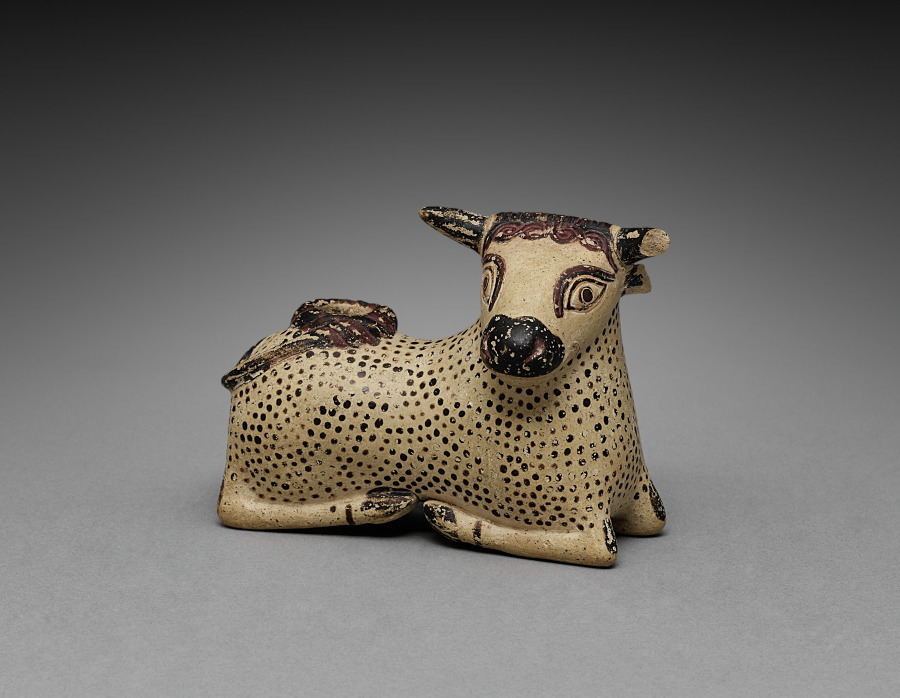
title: Oil Flask in the Shape of a Bull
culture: Greek, Corinthian or modern forgery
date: 600–575 BCE or 1900s CE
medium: ceramic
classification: Ceramic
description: This small bull-shaped flask is similar in form and painted decoration to a class of figure-shaped perfume vessels created during the late seventh and early sixth centuries BC in Greece and Italy (especially Corinth, Rhodes, and Etruria). The stippled body decoration characterizes such vases from multiple sites, while the light-colored clay and inconspicuous orifice placement are typical of Corinth. But no other reclining bulls are known among such vases (and only a few bullheads or upper bodies), raising questions about authenticity. A 1986 analysis determined that this object had been recently fired, and a 2020 clay analysis placed its origin in the Catalonia region of Spain, far from any known ancient production area for such flasks.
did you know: The curled tail masks a filling hole atop the back.